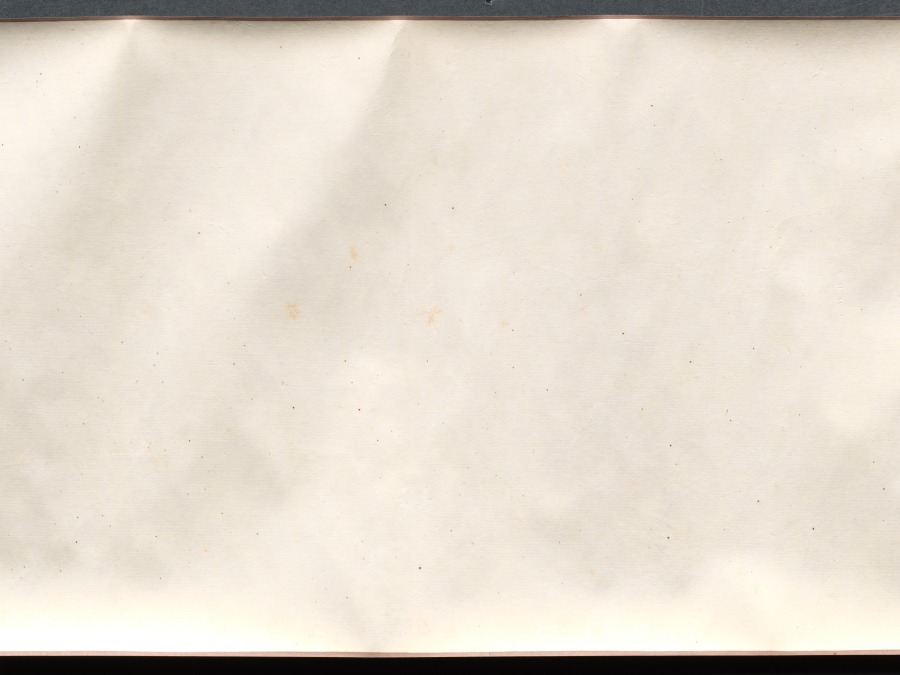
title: Four Poems: Calligraphy in Cursive Script (xingshu)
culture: China, Ming dynasty (1368–1644)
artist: Chen Jiru (Chinese, 1558–1639)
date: 1500s-1600s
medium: handscroll; ink on gold speckled paper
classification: Calligraphy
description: Written in graceful calligraphy with well-composed characters, the artist communicates his thoughts and state of mind in four poems. Characters written in dark, thick strokes convey rhythm, and indicate the moment after the writer had paused to recharge his brush with ink. Chen Jiru was a native of Huating (modern Shanghai). His calligraphy style resembles that of his friend, influential calligrapher Dong Qichang (1555–1636). Unlike Dong, Chen did not pursue government service: he burned his Confucian robes, declined a summons to serve at court, and immersed himself in literature, calligraphy, and painting.